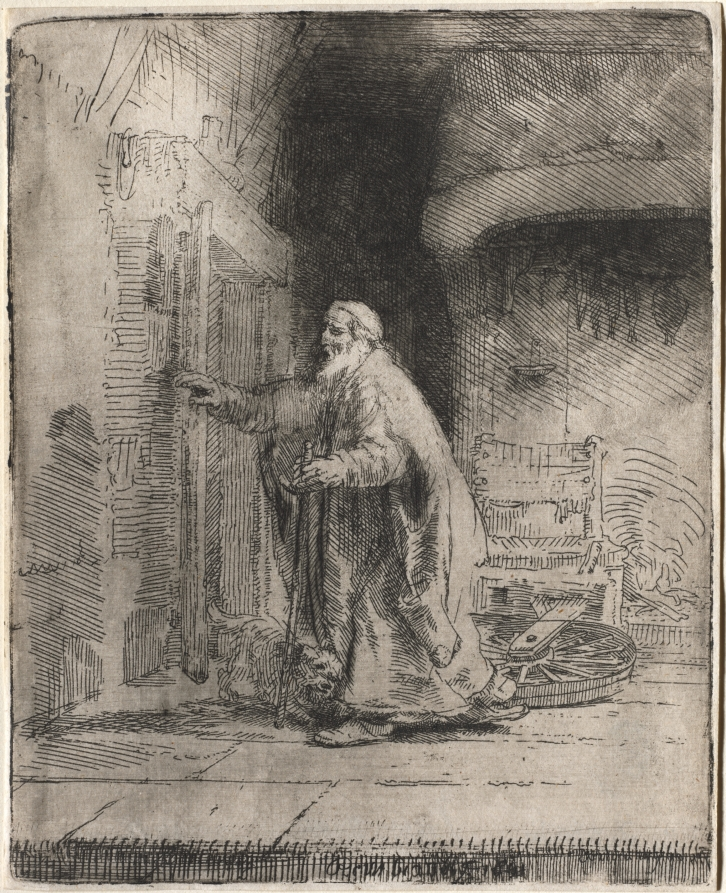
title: The Blindness of Tobit: The Large Plate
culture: Netherlands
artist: Rembrandt van Rijn (Dutch, 1606–1669)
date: 1651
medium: etching and drypoint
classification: Print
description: Having sent Tobias to collect a debt, a blind Tobit knocks over his wife’s spinning wheel and gropes for the door in his excitement to see his long-absent son. Rembrandt selectively inked and wiped the plate of this beautiful impression to enhance the scene’s meaning. The dark ink left behind the figure accentuates Tobit’s isolation and makes his beard-the only area of the print without any ink-seem even brighter, dramatizing the father’s anguished expression. Tobit’s shadow is cast by the firelight onto the wall to the far left of the doorway, symbolizing how far he has strayed from his goal and the poignancy of his condition.